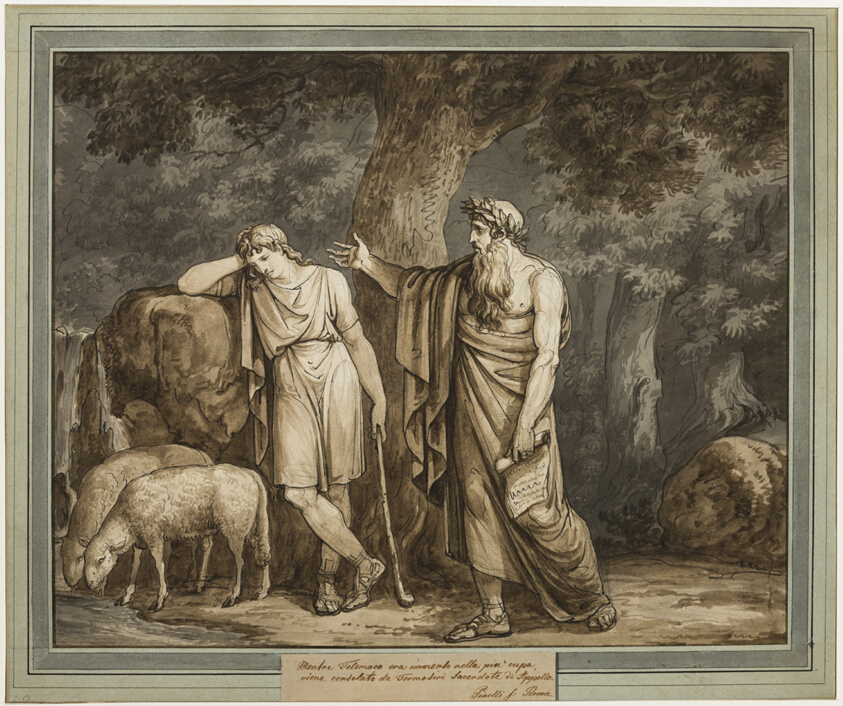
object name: Drawing and Watercolor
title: Telemachus is Consoled by Termosiris, Priest of Apollo, from The Adventures of Telemachus, Book 2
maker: Bartolomeo Pinelli (Italian, 1781-1835)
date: 1808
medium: Pen and black ink, with brush and gray and brown wash, over black chalk on ivory laid paper, laid down on board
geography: Italy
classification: watercolor; drawings (visual works); prints and drawing